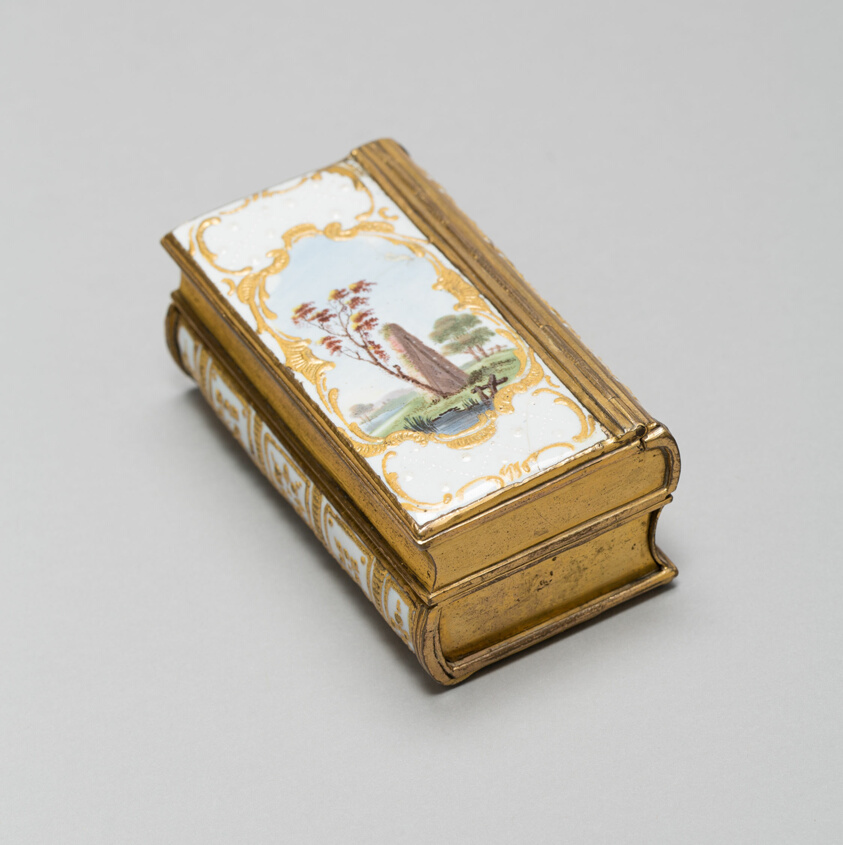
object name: Metalwork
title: Nécessaire in the Form of Two Books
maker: Bilston, England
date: 1765/85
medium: Polychrome enamel and gilding on copper with gilt bronze mounts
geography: Bilston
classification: enamel; metalwork